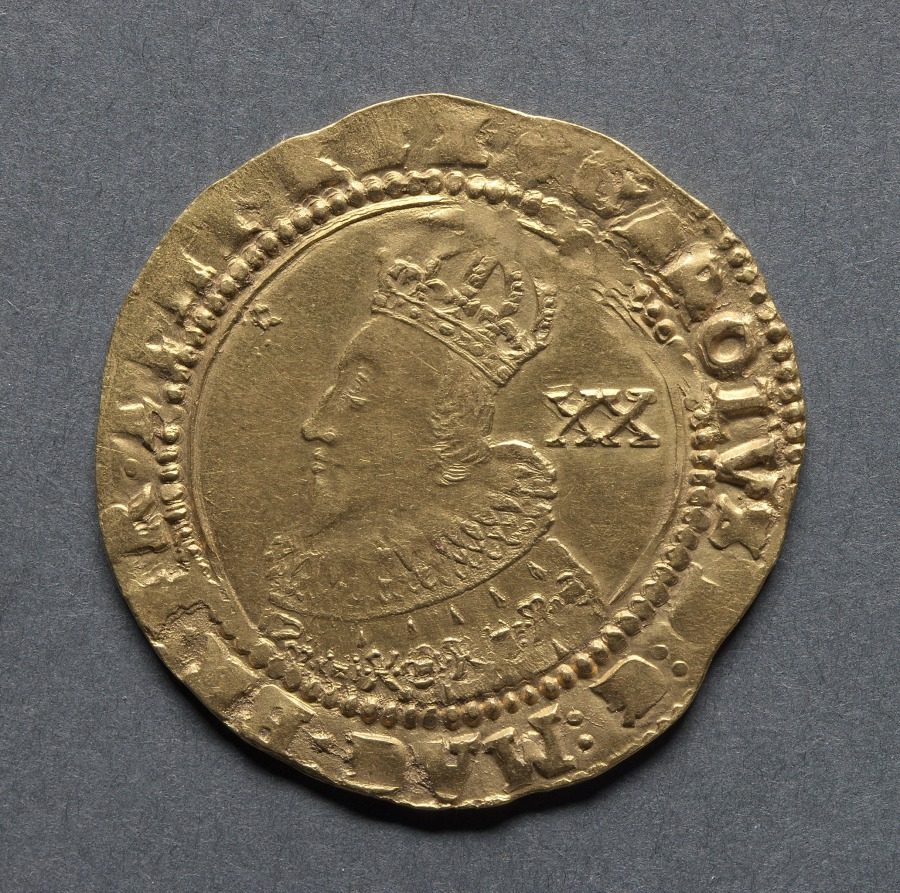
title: Unite: Charles I (obverse); Crowned Shield (reverse)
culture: England, Charles I, 1625-1649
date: 1625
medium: gold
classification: Coins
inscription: CAROLUS D G MAG BR FR ET HI REX. XX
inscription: FLORENT CONCORDIA REGNA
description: After ascending to the throne, Charles I ordered that the coinage should remain the same types and denominations as that of James I. Throughout all the troubles of his reign he did not alter the value of the gold coinage. Until the English Civil War started in 1642, the king's authority continued to rule the Tower mint. With the appointment of Sir John Coniers as Lieutenant of the Tower, control of the mint passed into the hands of the Parliamentary party, which continued to strike coins bearing the king's effigy and titles. To keep the Royalist party supplied with money, Charles opened other mints at York, Aberystwyth, Shrewsbury, Oxford, Bristol, Truro, Exeter, Weymouth, and Chester, while a mint operated near Worcester in 1646. During the civil war mints operated in the besieged towns of Carlisle, Colchester, Newark, Pontefract, and Scarborough, and produced a number of irregularly shaped coins of many odd denominations hastily struck from local domestic plate.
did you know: The gold unite was valued at 20 shillings, the roman numeral XX can be seen on the obverse.